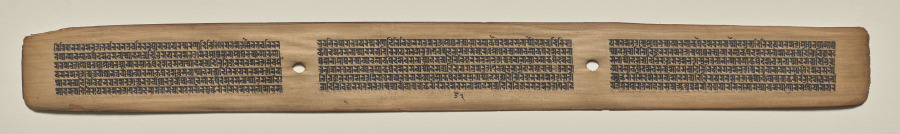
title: Text, Folio 95 (recto), from a Manuscript of the Perfection of Wisdom in Eight Thousand Lines (Ashtasahasrika Prajnaparamita-sutra)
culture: Eastern India, Bihar, Vikramashila Monastery. Painting: Nepal, Kathmandu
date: Sunday, September 14, 1119 (year 239 of the Newar Samvat in the month of Ashvina)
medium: gum tempera and ink on palm leaves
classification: Painting